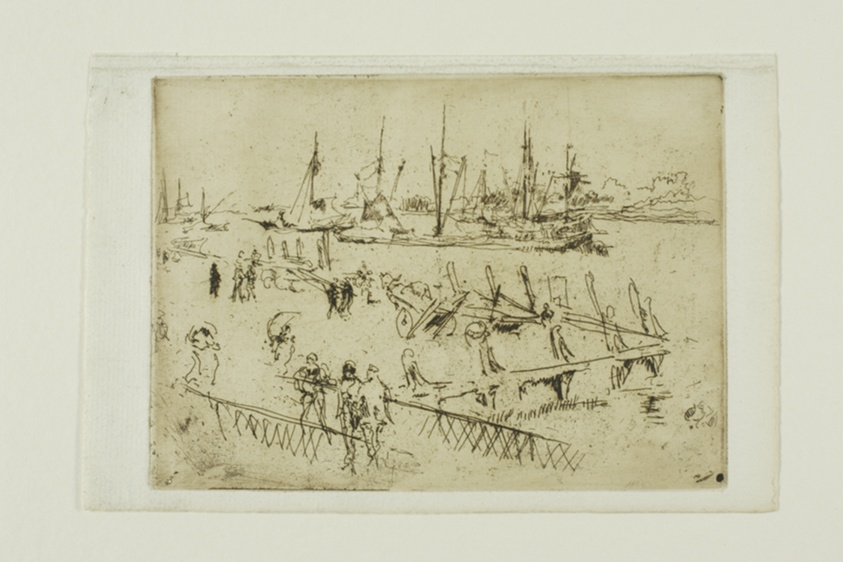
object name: Print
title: Little Dordrecht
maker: James McNeill Whistler (American, 1834-1903)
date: 1886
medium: Etching with foul biting in dark brown ink on off-white laid paper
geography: United States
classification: etching; foul biting; print; prints and drawing; paper